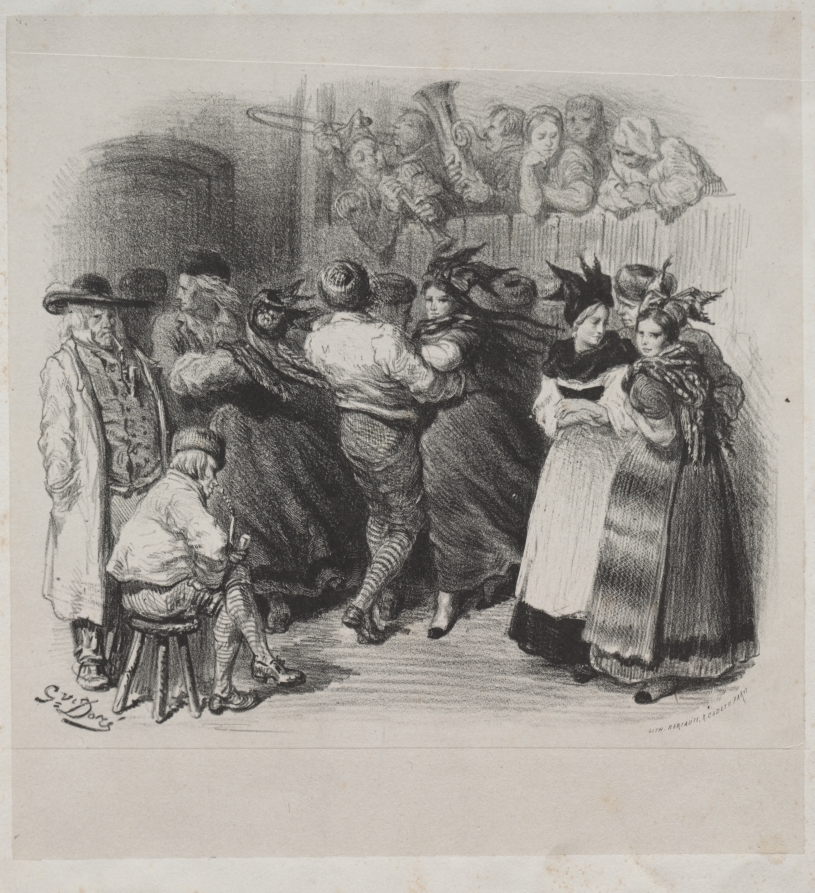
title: Musical Works of Ernest Doré: Souvenir of Alsace, Alsatian Dance - Title Page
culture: France, 19th century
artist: Gustave Doré (French, 1832–1883)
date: late 1800s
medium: lithograph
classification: Print